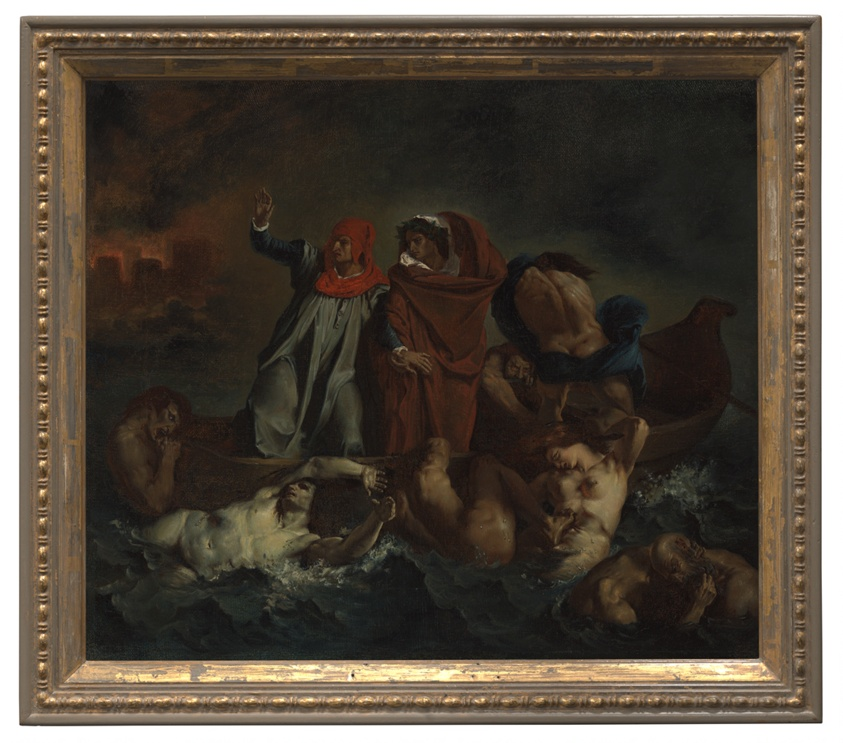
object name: Painting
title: Dante's Bark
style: 19th century, nineteenth century, romantic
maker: After Eugène Delacroix (French, 1798–1863)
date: c. 1840–60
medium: Oil on canvas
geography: France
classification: painting; oil paintings (visual works); paint; france; french; oil on canvas; european painting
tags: travel, boatman, boats, cities, death, France, French, Greek, Greek mythology, men, poetry, smoke, storms, water, wind, Century of Progress, world's fairs, Chicago World's Fairs